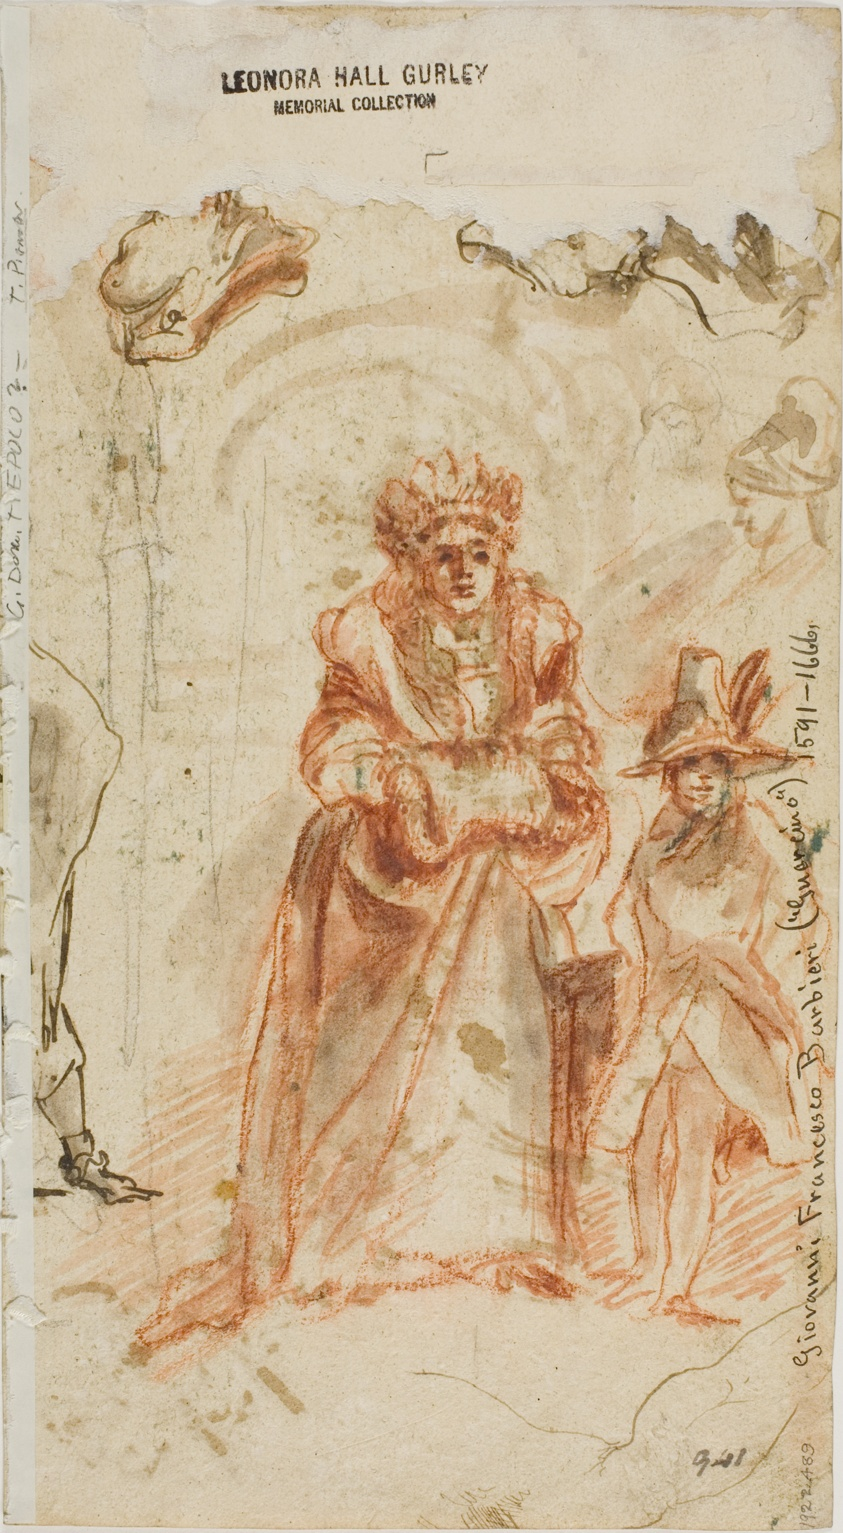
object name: Drawing and Watercolor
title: Sketches of Male Heads (recto); Queen and Page (verso)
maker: Possibly Giambattista Tiepolo (Italian, 1696-1770); or Giovanni Domenico Tiepolo (Italian, 1727-1804)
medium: Pen and brown ink with brush and brown wash (recto) and red chalk with brush and red chalk wash; pen and brown ink, with traces of black chalk (verso) on ivory laid paper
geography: Italy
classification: drawings (visual works); prints and drawing